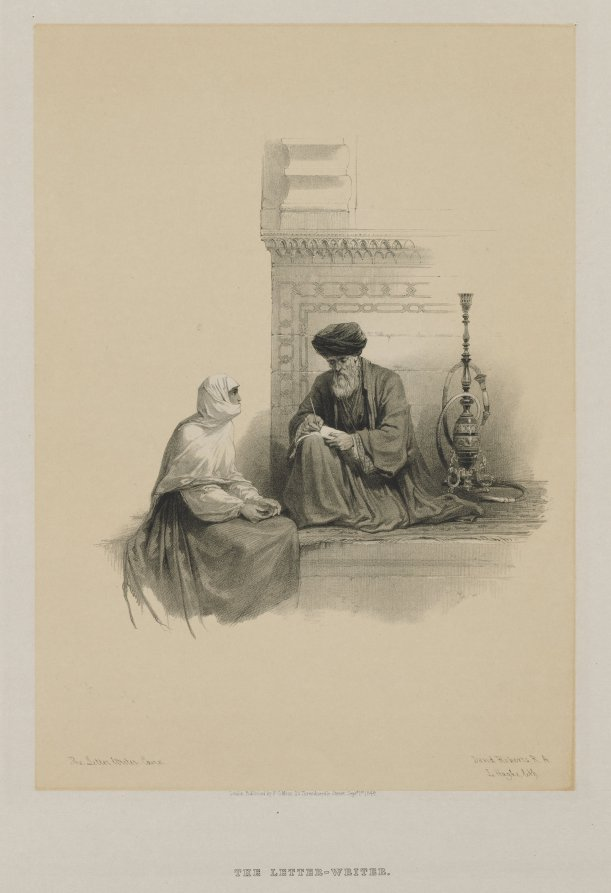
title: Egypt and Nubia, Volume III: The Letter-Writer, Cairo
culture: England, 19th century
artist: Louis Haghe (British, 1806–1885)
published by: F. G. Moon, 20 Threadneedle Street, London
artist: after David Roberts (Scottish, 1796–1864)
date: 1849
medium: color lithograph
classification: Print